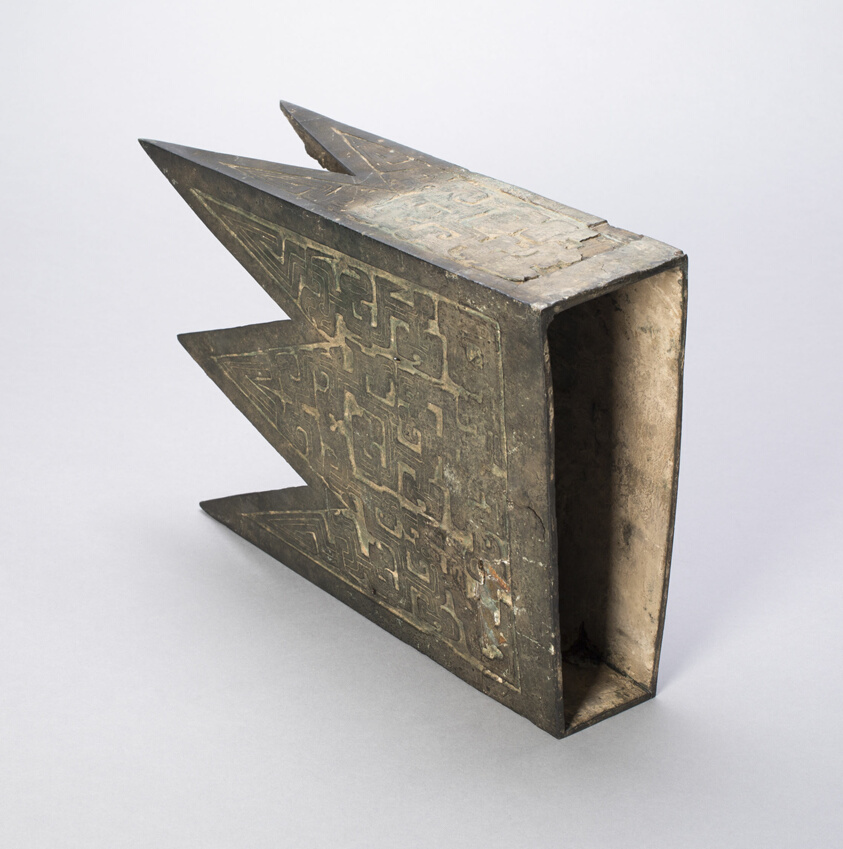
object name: Architectural fragment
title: Architectural Fitting (Gong)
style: Chinese (culture or style)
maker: China, Qishan county, Shaanxi province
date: Eastern Zhou dynasty, Spring and Autumn period (770–481 B.C.), 7th century B.C.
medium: Bronze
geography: China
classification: architectural fragment